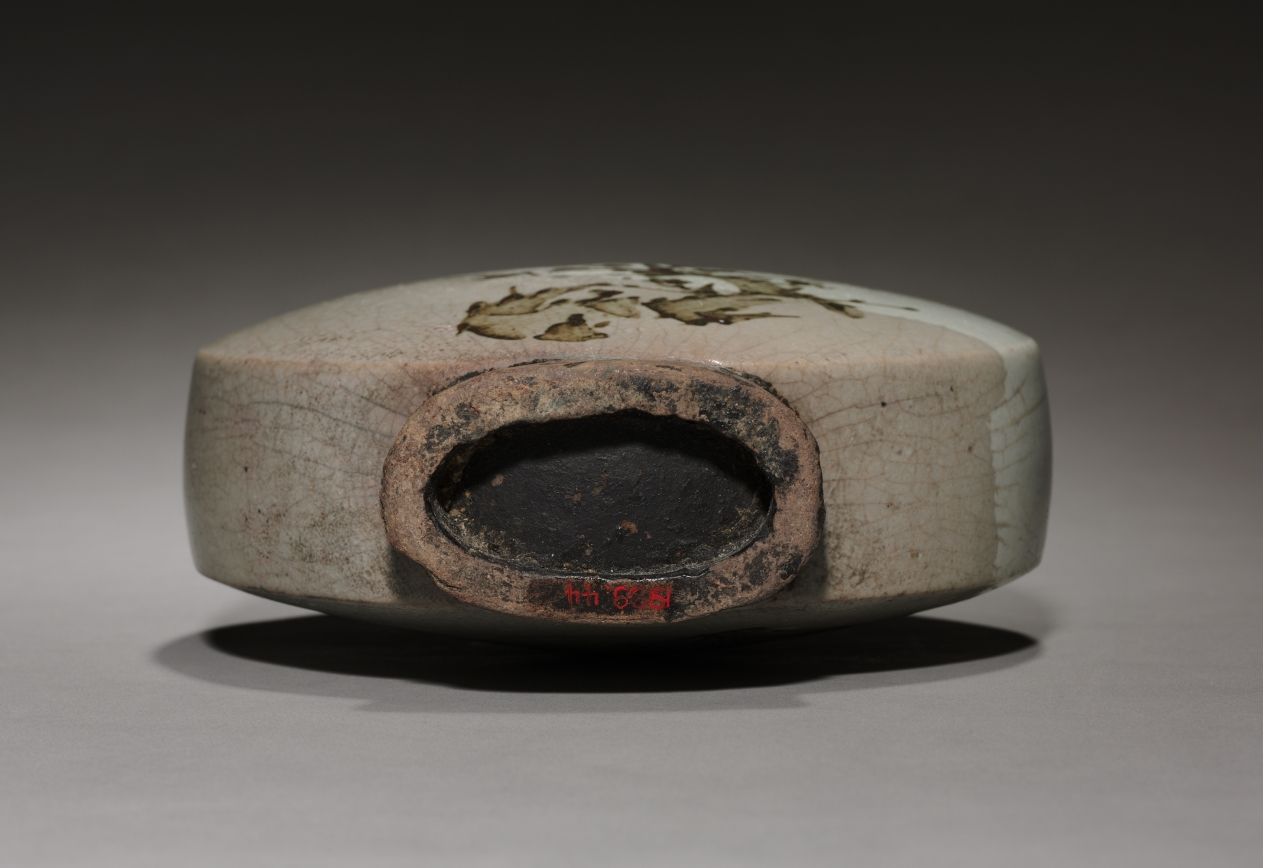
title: Wine Flask with Plum and Bamboo Design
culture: Korea, Joseon dynasty (1392–1910)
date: 1600s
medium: glazed porcelain with underglazed iron design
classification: Ceramic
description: This Korean wine flask embodies Lin Bu’s poetic line "Plums’ subtle scent pervades the moonlit dusk": its circular shape alludes to the full moon, and the gray color unintentionally spread on the flask’s lower part suggests the permeating scent of plum. The other side of the flask features a bamboo design. The plum and bamboo derive from the motif of the Four Gentlemen, which compares four plants to Confucian scholarjunzi, or "gentlemen."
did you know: The shape of this bottle can be traced all the way back to an ancient Persian pilgrim’s flask.